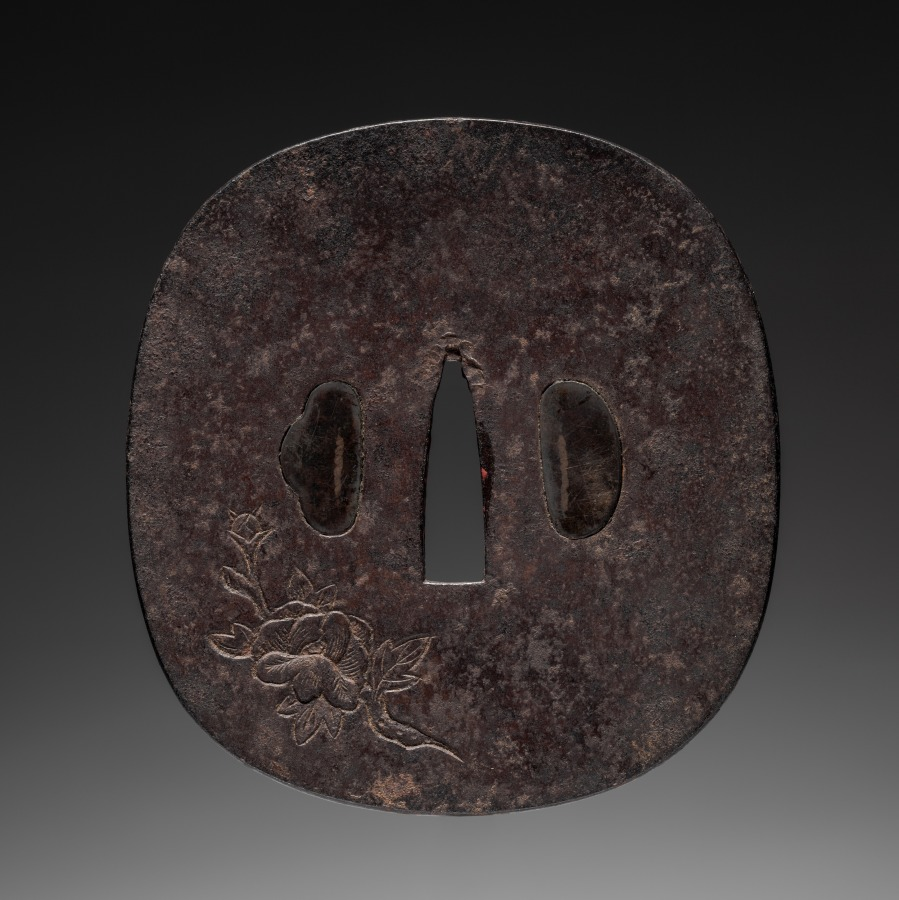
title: Sword Guard (Tsuba) with Peony and Lion with Ball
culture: Japan, possibly Edo period (1615-1868)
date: c. 1615–1868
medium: iron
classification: Arms and Armor